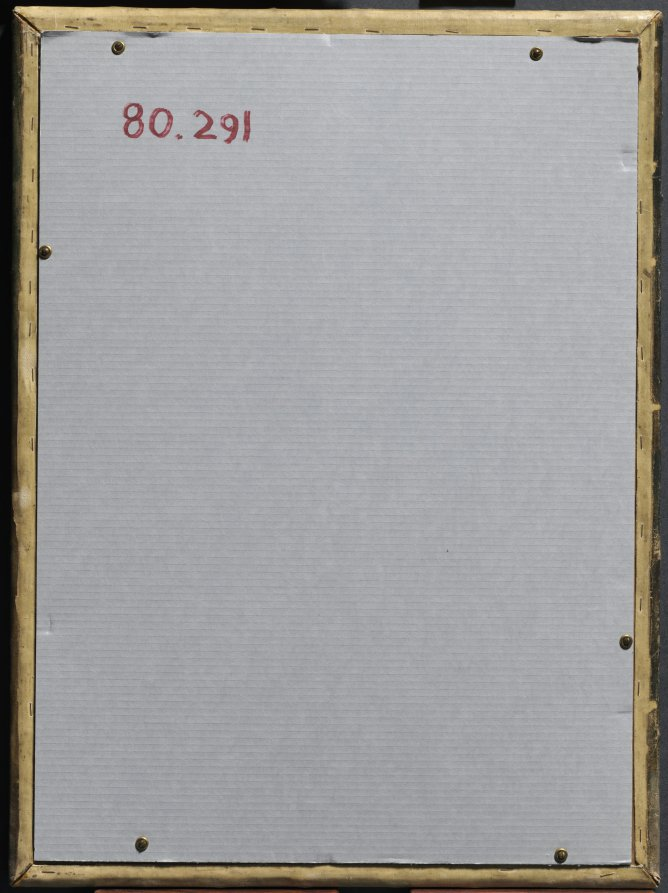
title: Combat of a Greek and a Turk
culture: France, 19th century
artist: imitator of Horace Vernet (French, 1789–1863)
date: after 1835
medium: oil on fabric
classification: Painting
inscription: Signed lower right: Horace Vernet